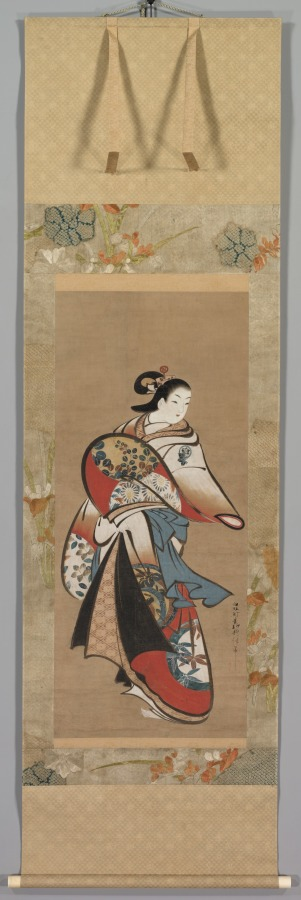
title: Courtesan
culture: Japan, Edo period (1615–1868)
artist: Matsuno Chikanobu (Japanese, active 1716–35)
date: 1716–35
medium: hanging scroll; ink and color on paper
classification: Painting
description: A glamorous courtesan sports an outer robe decorated with large roundels featuring plant motifs including iris and bush clover. Little is known about the life and artistic training of the painter Matsuno Chikanobu, an ukiyo-e artist who painted in a style strongly reminiscent of that of the Kaigetsudō studio. Many of his known paintings are on silk, and executed with high quality pigments, indicating that his primary clientele were wealthy individuals.